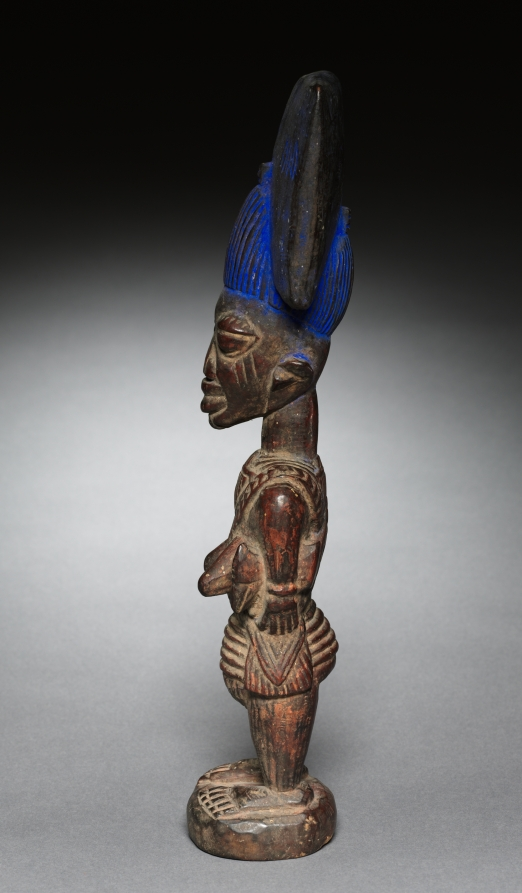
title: Shrine Figure for Sàngó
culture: Africa, West Africa, Nigeria, Yorùbá-style maker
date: c. 1910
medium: Wood, probably bluing, and organic material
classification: Sculpture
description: Sàngó is a king turned god in the Yorùbâ cosmology. One of the many òrìṣà—a god or divine spirit—that Yorùbá people can become devotees of and appeal to, Sàngó is often associated with lightning and thunder. The shape atop the female figure's head is the double-axe symbol of Sàngó. She wears a triangle-shaped amulet, waist beads, and bracelets, all signifying that she is a priestess. Standing on a base, rather than a handle, this figure was likely placed in a shrine dedicated to Sàngó.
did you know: The bright blue color on this sculpture is bluing, a powdered product used to brighten laundry.